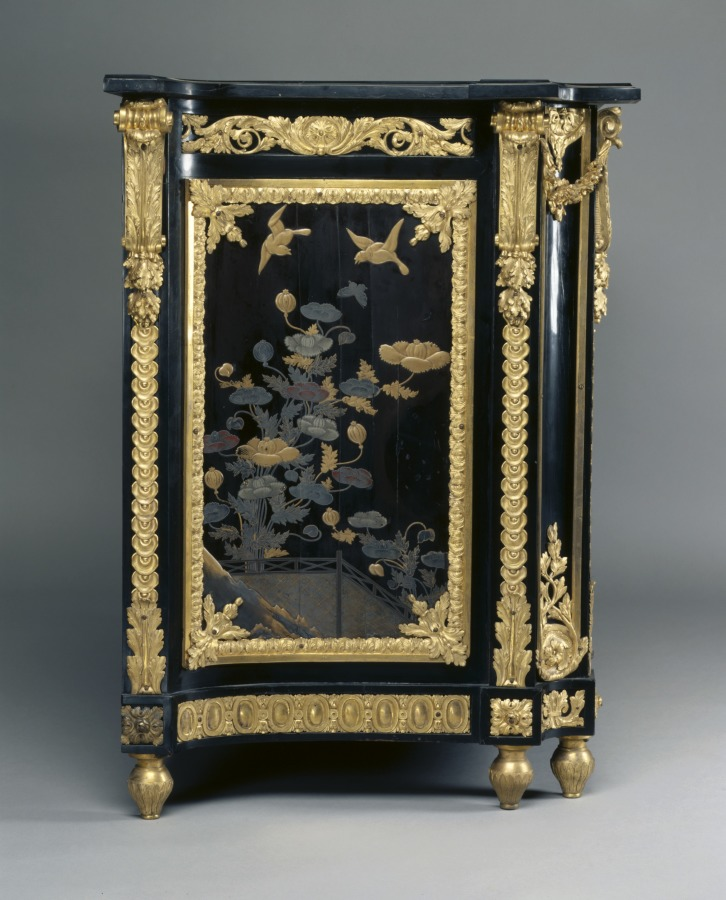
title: Chest of Drawers (Commode)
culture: France, Paris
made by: René Dubois (French, 1737–1798)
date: c. 1765– 1770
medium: ebony veneer with Japanese lacquer panels, gilt bronze mounts, and marble top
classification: Furniture and woodwork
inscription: signed on top front corners: I. Dubois.